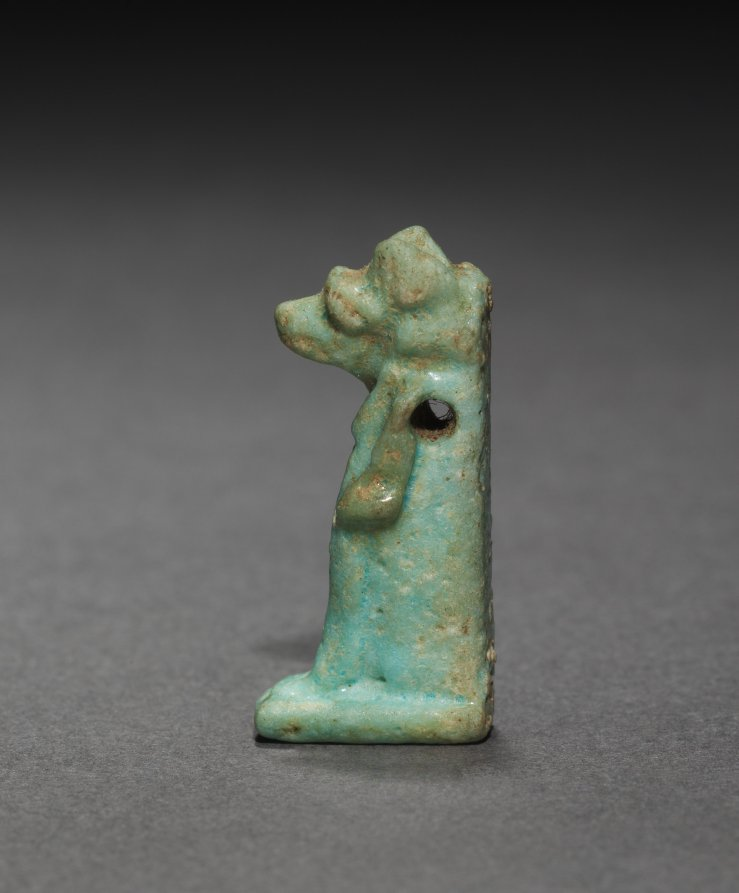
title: Amulet of Anubis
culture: Egypt, Greco-Roman period (332 BCE–395 CE), Ptolemaic dynasty (305–30 BCE)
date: 305–30 BCE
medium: light robin's egg blue faience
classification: Amulets